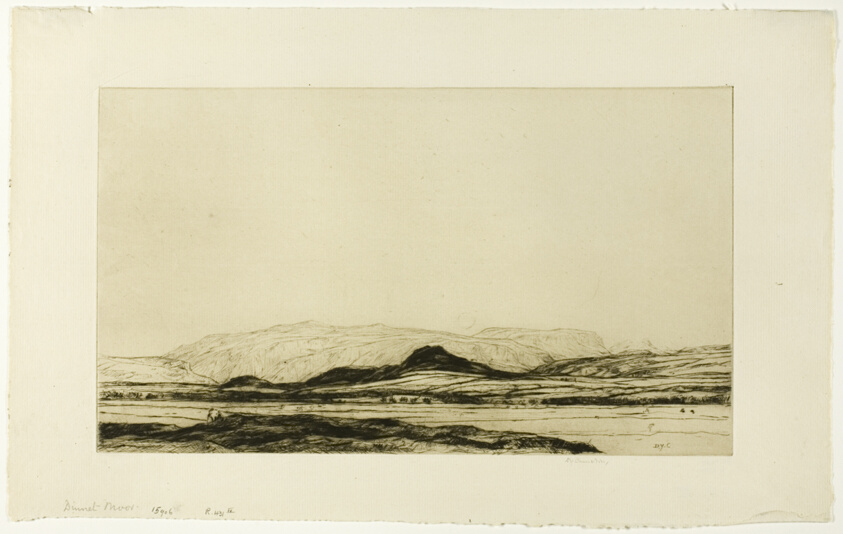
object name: Print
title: Dinnet Moor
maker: David Young Cameron (Scottish, 1865-1945)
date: 1912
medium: Drypoint on cream laid paper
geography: Scotland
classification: drypoint; print; prints and drawing